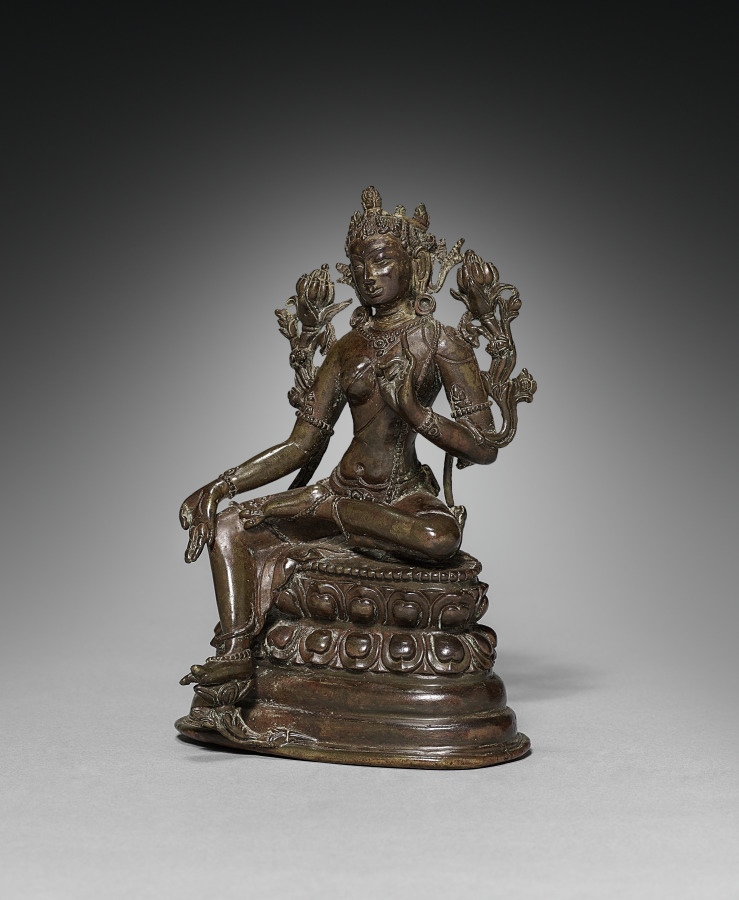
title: Seated Tara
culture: India, Bengal, late Pala dynasty, 12th Century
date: 1100s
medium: bronze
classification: Sculpture